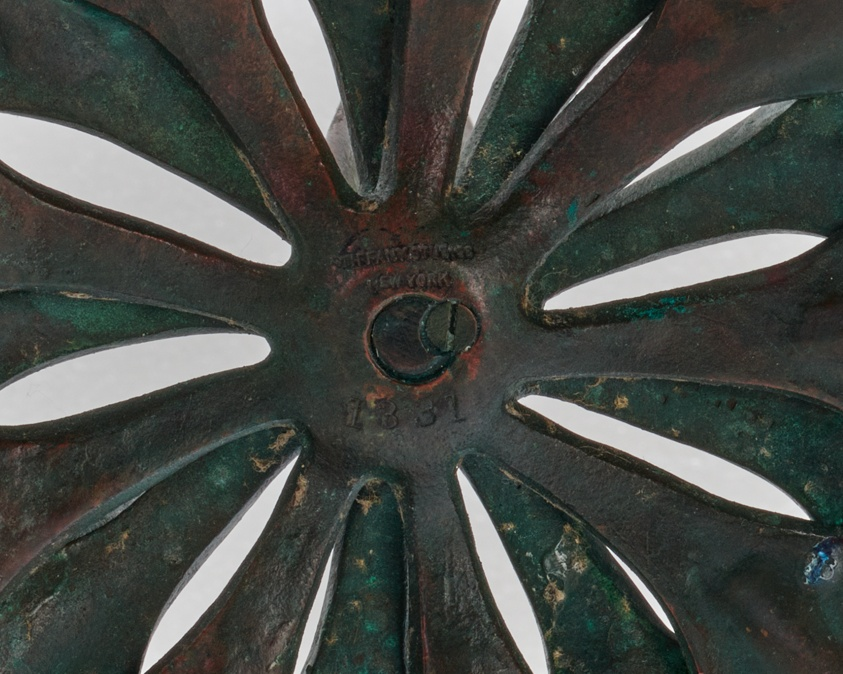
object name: Metalwork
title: “Saxifrage” Candlestick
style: Arts and Crafts Movement, 20th Century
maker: Tiffany Studios (American, 1902–32); Corona, New York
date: c. 1905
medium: Bronze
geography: Corona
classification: candleholder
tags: saxifrage, flowers